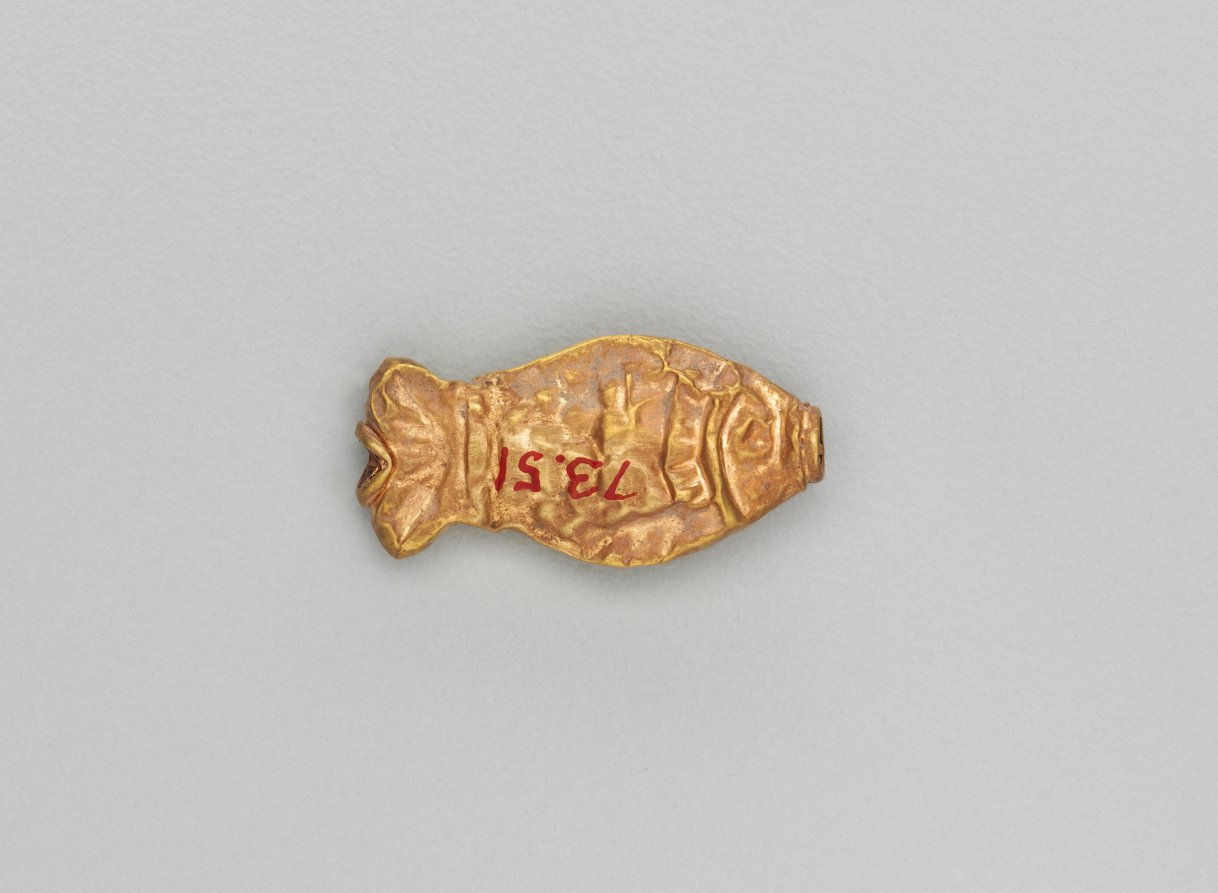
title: Necklace Bead in the Form of a Fish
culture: India, Shunga period (185–78 BCE)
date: 185–72 BCE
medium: gold repoussé with granulation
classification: Jewelry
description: Jewelry in ancient India often consisted of elements associated with water, such as fish and other aquatic plants and animals. Since water is essential for life, imagery that connotes water is life-affirming, or auspicious, and therefore appropriate adornment.